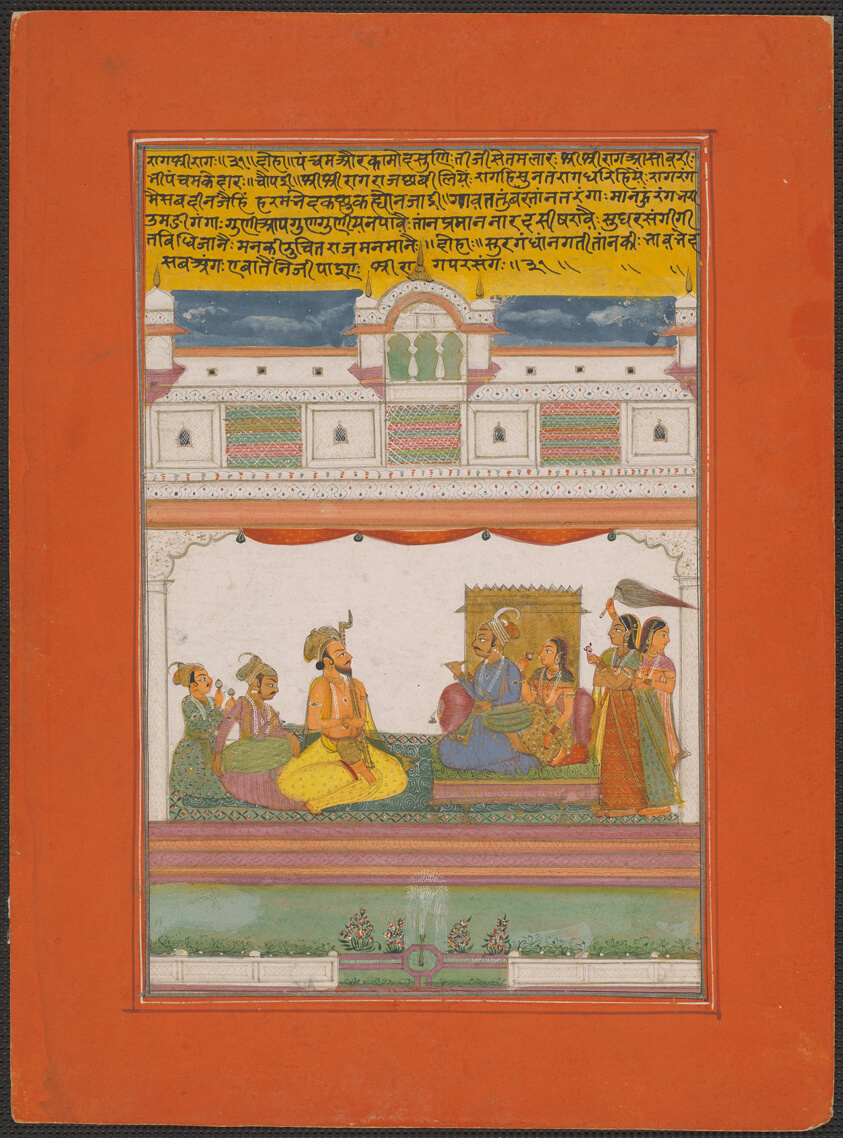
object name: Painting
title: Raga Shri-rag, Page from a Jaipur Ragamala Set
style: South Asian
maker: India; Rajasthan, Jaipur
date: c. 1750-1770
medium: Opaque watercolor and gold on paper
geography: Rajasthan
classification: miniature painting; painting; asian art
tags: music, musicians